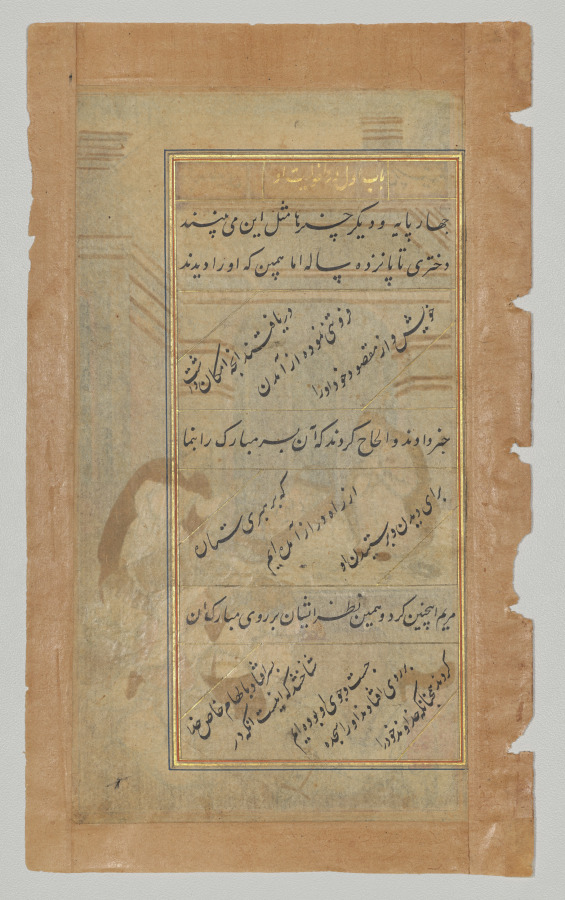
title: Text page from a Mirror of Holiness (Mir’at al-quds) of Father Jerome Xavier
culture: Mughal India, Allahabad, made for Prince Salim (1569–1627)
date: 1602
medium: Ink and gold on paper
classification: Manuscript